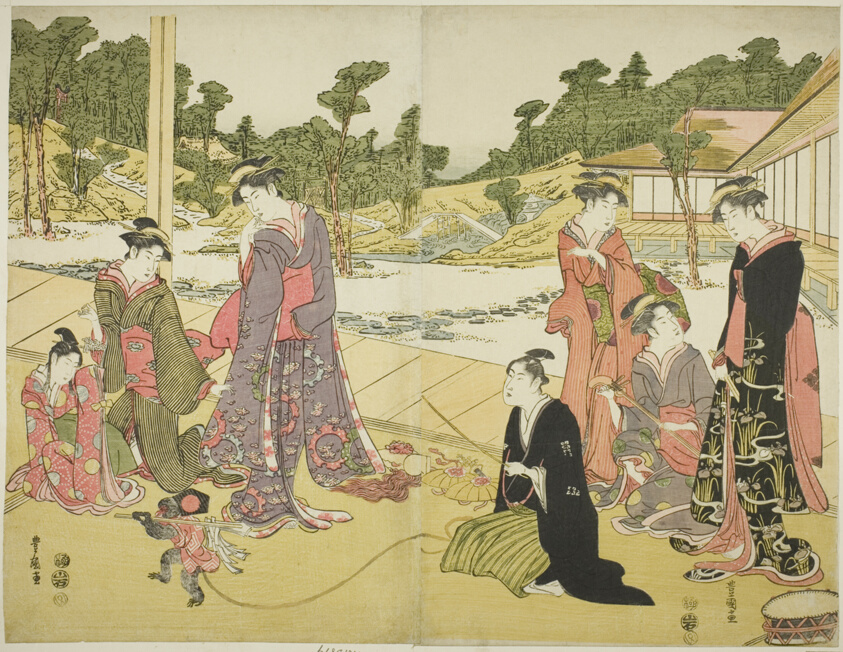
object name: Print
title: The Young Monkey Showman (Wakashu sarumawashi)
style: Japanese (culture or style)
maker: Utagawa Toyokuni I 初代 歌川 豊国; Japanese, 1769–1825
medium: Color woodblock print; oban diptych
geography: Japan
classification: woodblock print; print; asian art